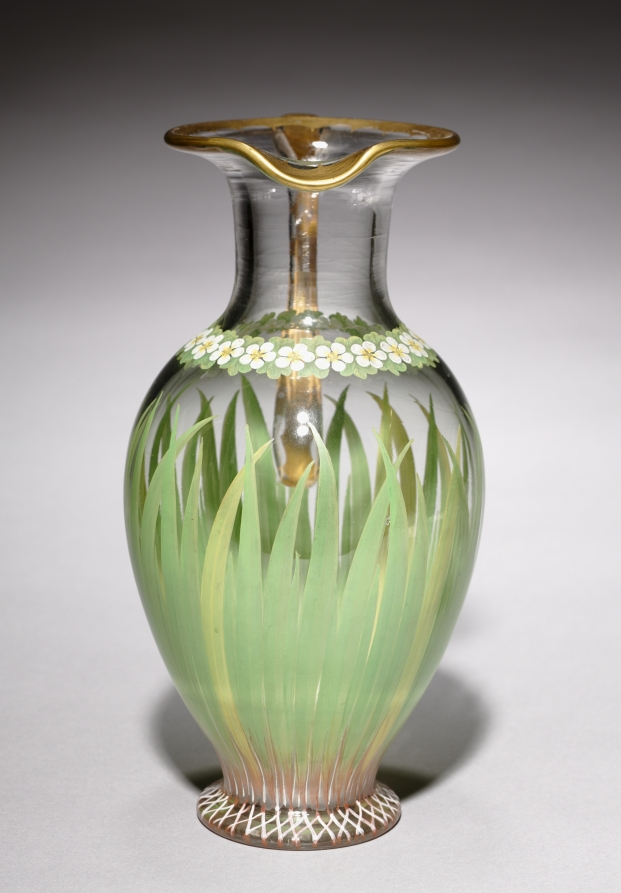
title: Jug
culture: England, 19th century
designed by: Richard Redgrave (British, 1804–1888)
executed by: J. F. Christy, Stangate Glass Works (British)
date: 1847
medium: glass, enamel decoration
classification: Glass